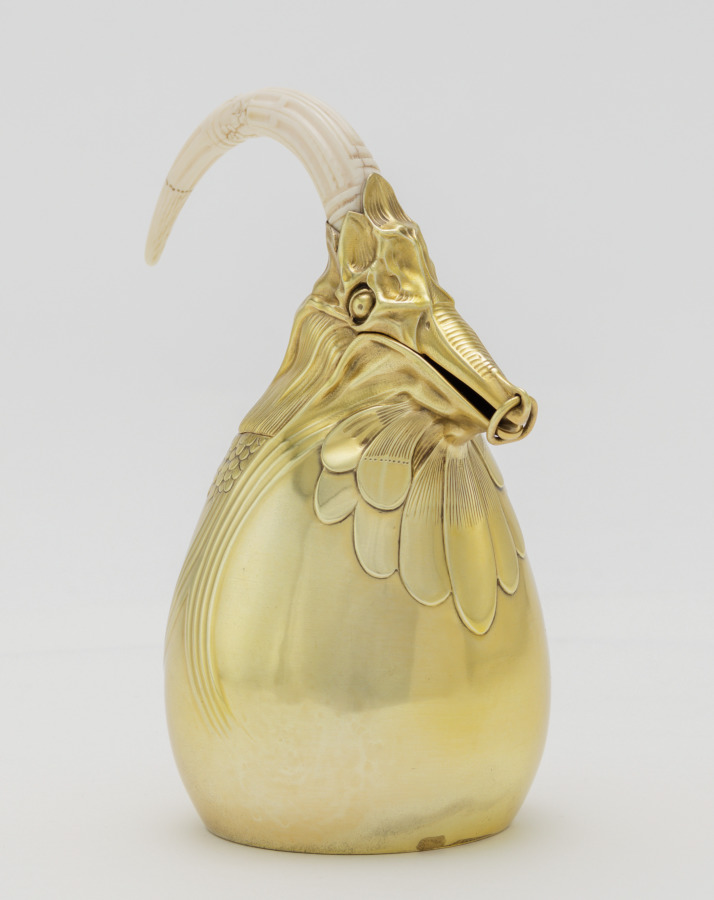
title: Coffee Pot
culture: France, Paris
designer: Carlo Bugatti (Italian, 1856–1940)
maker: Adrien-Aurélien Hebrard (French, 1866–1937)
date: c. 1907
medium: Gilt silver and ivory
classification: Silver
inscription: Made by A. A. Hebrard Firm, Paris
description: This tea and coffee service, salver, and table, together with some now missing cups, were all designed by Carlo Bugatti as an ensemble and presented at the 1902 exposition devoted to decorative arts in Turin, Italy. The set was probably acquired from Bugatti's 1907 exhibition at the Galerie Hébrard in Paris by a wealthy South African widow, Anna Blake, who was living there at the time. Some of the animal and insect motifs suggest mythical beasts or the fossils of prehistoric animals. When Mrs. Blake returned to Cape Town, she took these and other pieces designed by Bugatti with her, and they remained in South Africa throughout her lifetime.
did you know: This coffee pot is part of a larger tea and coffee service designed by Carlo Bugatti.